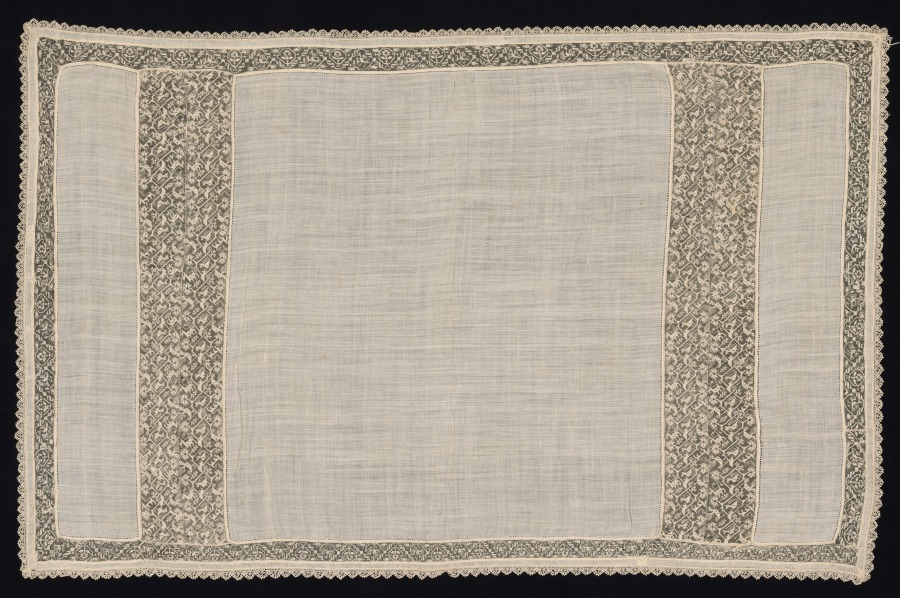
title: Cloth with Winged and Two-Tailed Animals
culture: Italy, 1600s-1700s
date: 1600s-1700s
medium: Bleached plain weave linen (est.): needle lace, filet/lacis (knotted ground and darned in two directions) and bobbin lace edging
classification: Lace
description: Strange two-tailed animals accompanied by birds appear on the filet/lacis lace. The compact pattern repeats horizontally, with inserted bands of two-tailed animals confronting birds. The bird motif is also depicted alongside a flower motif on the outer filet/lacis border.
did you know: This cloth was given to the museum by Louise Tifft Brown, a native Clevelander who became an expert in lace while living in Venice for 35 years.